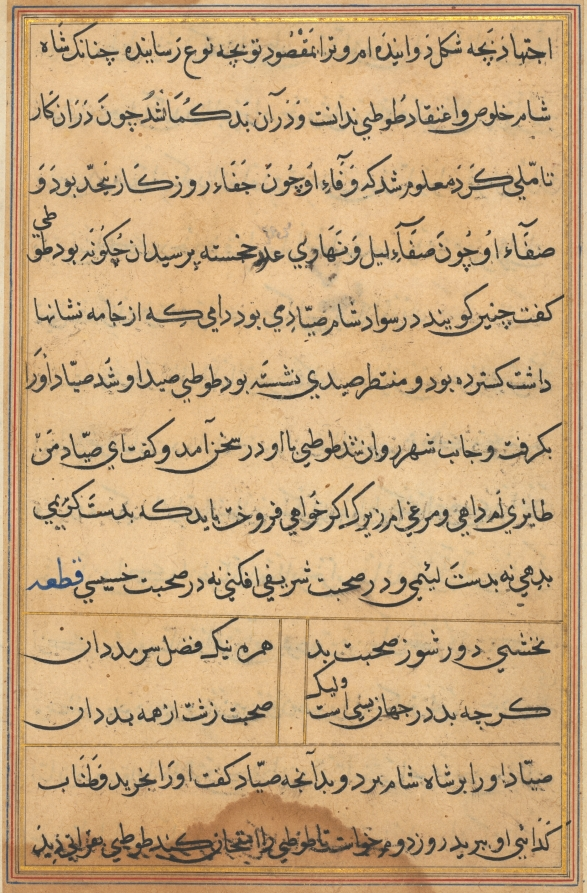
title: Page from Tales of a Parrot (Tuti-nama): text page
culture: Mughal India, court of Akbar (reigned 1556–1605)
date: c. 1560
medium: gum tempera, ink, and gold on paper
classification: Painting